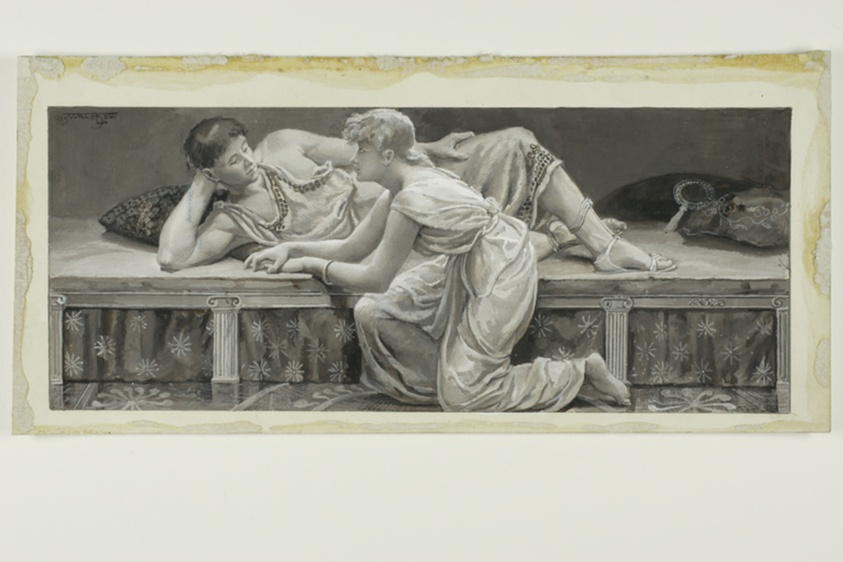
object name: Drawing and Watercolor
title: She Nothing Said, But Pale and Meek, Arose and Knelt Before Him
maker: Will Hicock Low (American, 1853-1932)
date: 1885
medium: Black, gray and white gouache on cream wood-pulp laminate board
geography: United States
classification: drawings (visual works); prints and drawing